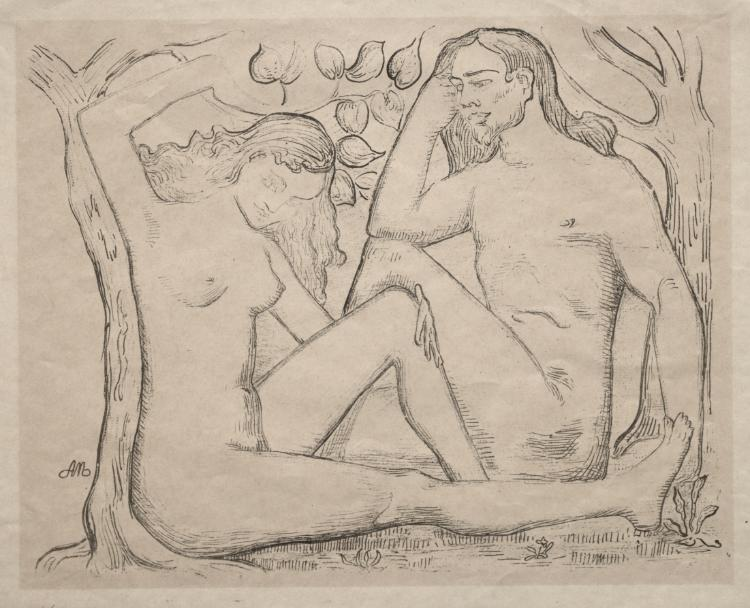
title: Nude Man and Woman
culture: France, 19th-20th century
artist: Aristide Maillol (French, 1861–1944)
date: c. 1900–1925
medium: lithograph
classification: Print